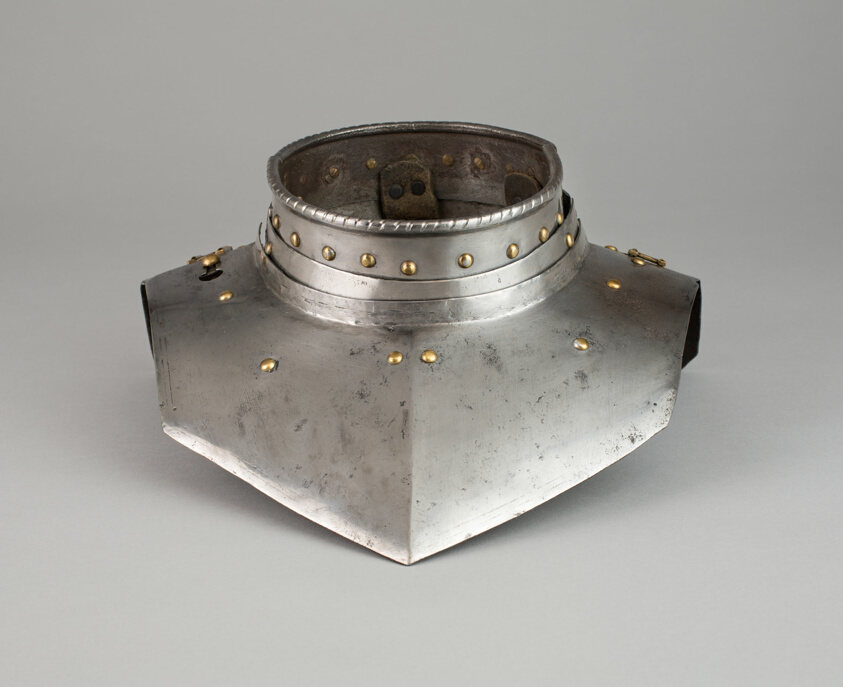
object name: Armor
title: Gorget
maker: European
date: 19th century in 16th century style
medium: Steel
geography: Europe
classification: suit-element; armor; arms and armor